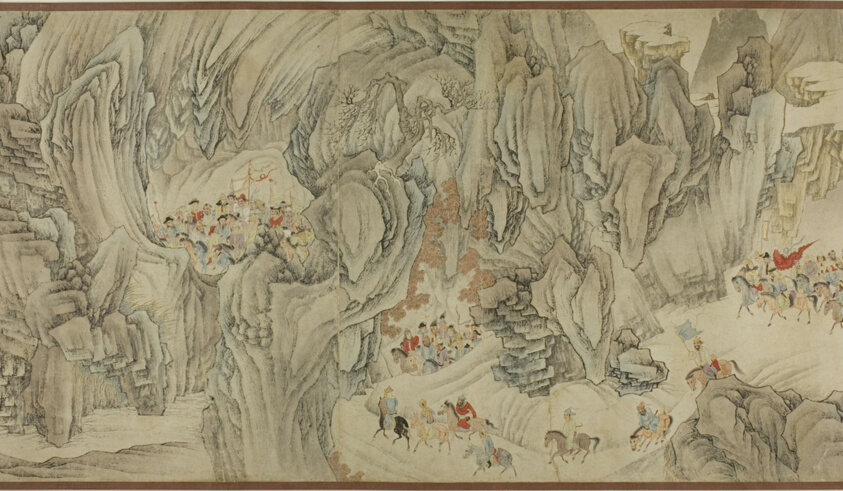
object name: Painting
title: A Hunt in the Mountains of Heaven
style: Chinese (culture or style)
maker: Artist unknown [spurious signature of Zhao Mengfu (1254-1322), dated 1301]; Chinese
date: Late Ming /early Qing dynasty, 17th century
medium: Handscroll; ink and color on paper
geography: China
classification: handscroll; painting; asian art